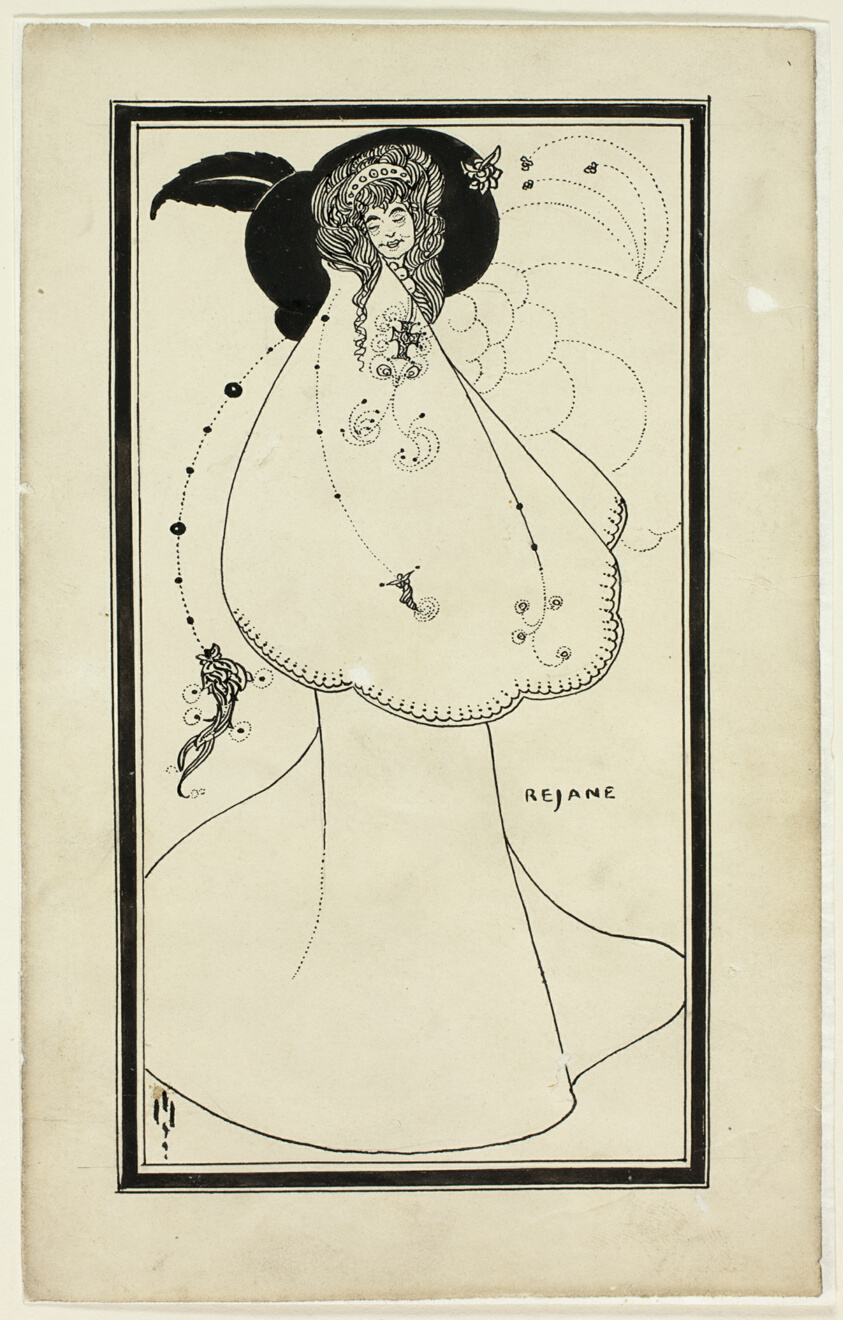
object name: Drawing and Watercolor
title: Madame Réjane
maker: Aubrey Vincent Beardsley, imitator of; English, 1872-1898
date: 1892/98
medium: Pen and brush and black ink, over traces of graphite, on cream wove paper, laid down on ivory wove paper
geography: England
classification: pen and ink drawings; drawings (visual works); prints and drawing